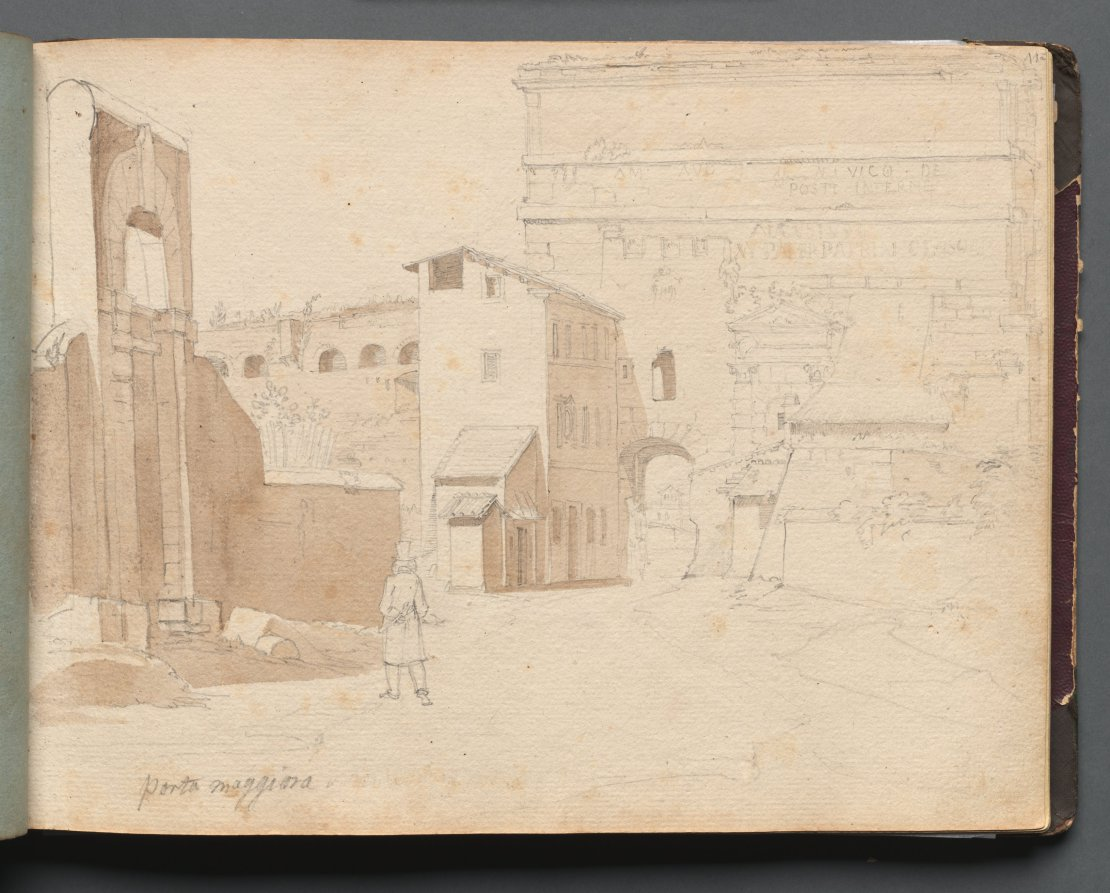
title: Album with Views of Rome and Surroundings, Landscape Studies, page 11a: "Porta Maggiore"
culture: Germany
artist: Franz Johann Heinrich Nadorp (German, 1794–1876)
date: c. 1830s-70s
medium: graphite with brown wash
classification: Bound Volume